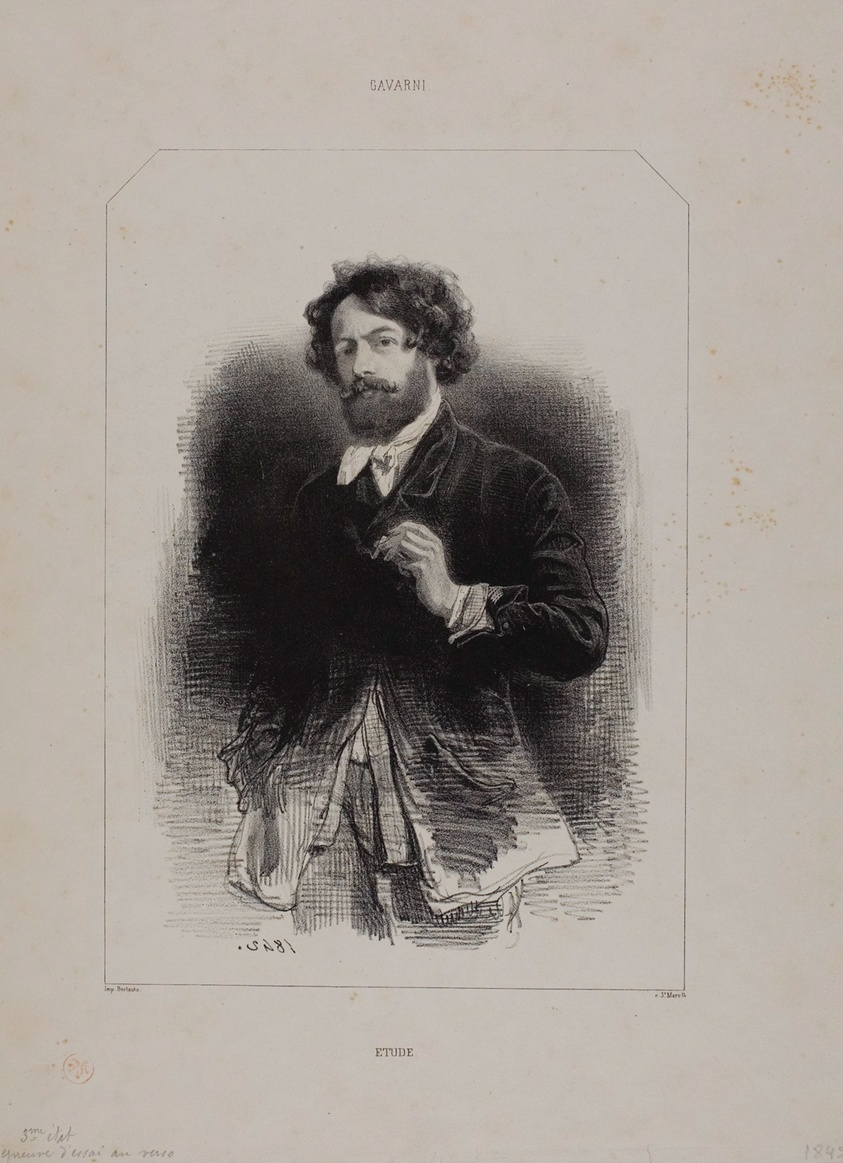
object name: Print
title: Self-Portrait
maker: Paul Gavarni (French, 1804-1866)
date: 1842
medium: Lithograph in black on cream wove paper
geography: France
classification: lithograph; print; prints and drawing